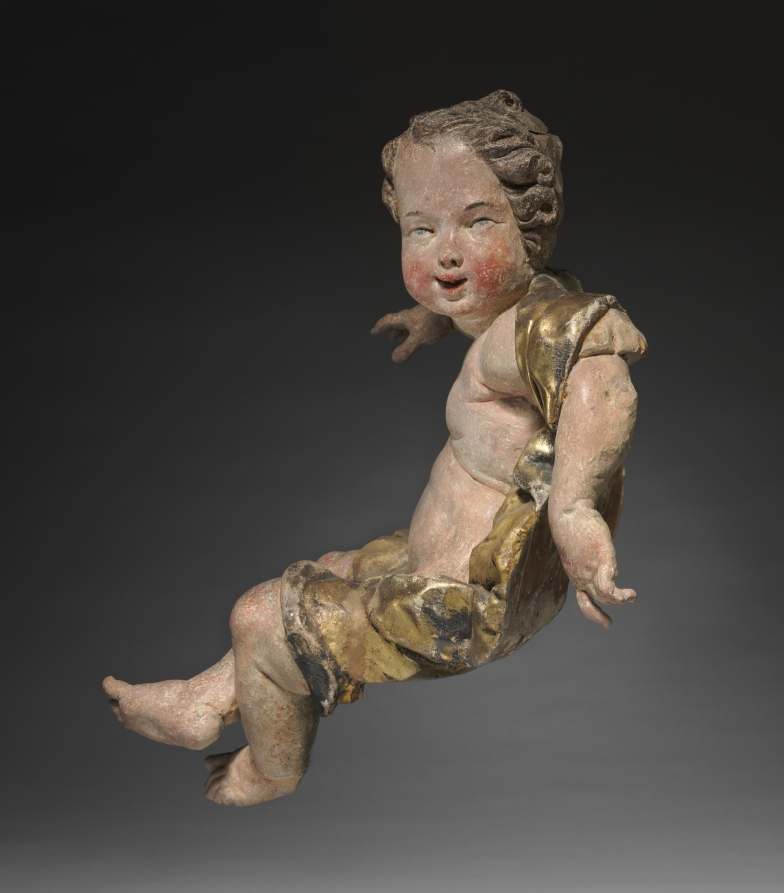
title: Putto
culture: Germany, near Bamberg, 18th century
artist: Ferdinand Tietz (Austrian, 1708–1777)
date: mid-1700s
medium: painted and gilded wood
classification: Sculpture